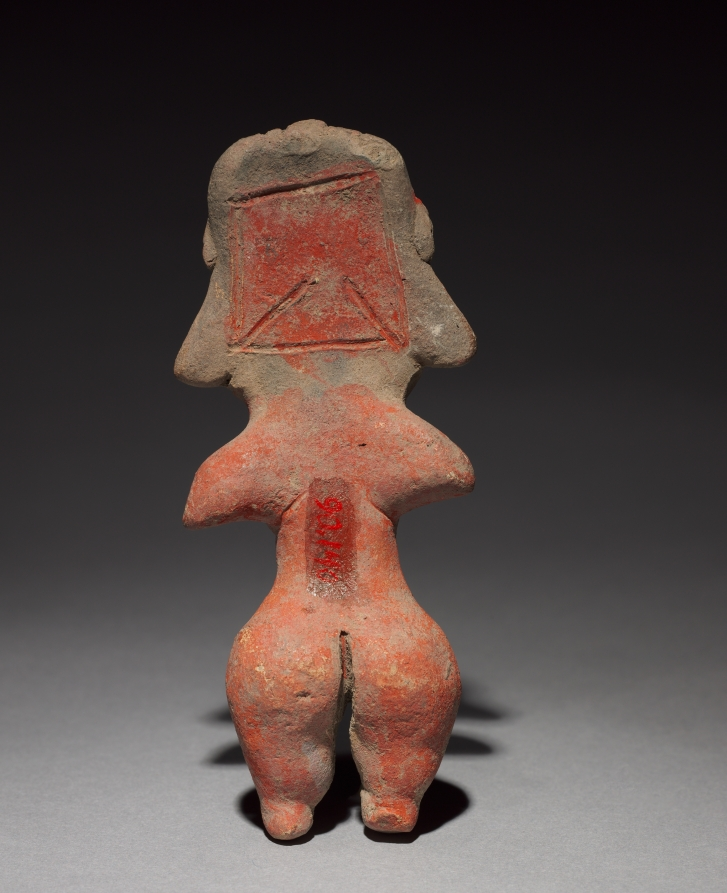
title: Female Figurine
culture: Mesoamerica, Central Mexico, Tlatilco, type D2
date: 1200–900 BCE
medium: pottery with white and red pigment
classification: Sculpture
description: This ceramic figurine—in the style of Tlatilco, an early village site in central Mexico—depicts a female with an enigmatic motif incised on the back of her head and substantial traces of red and white pigment. Since many figurines from the period depict females, modern interpreters usually connect them to fertility concerns. They also seem to testify to the importance of women among early Mesoamerican cultures.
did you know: While many figurines are nude, they were likely dressed in perishable clothing and accessories.